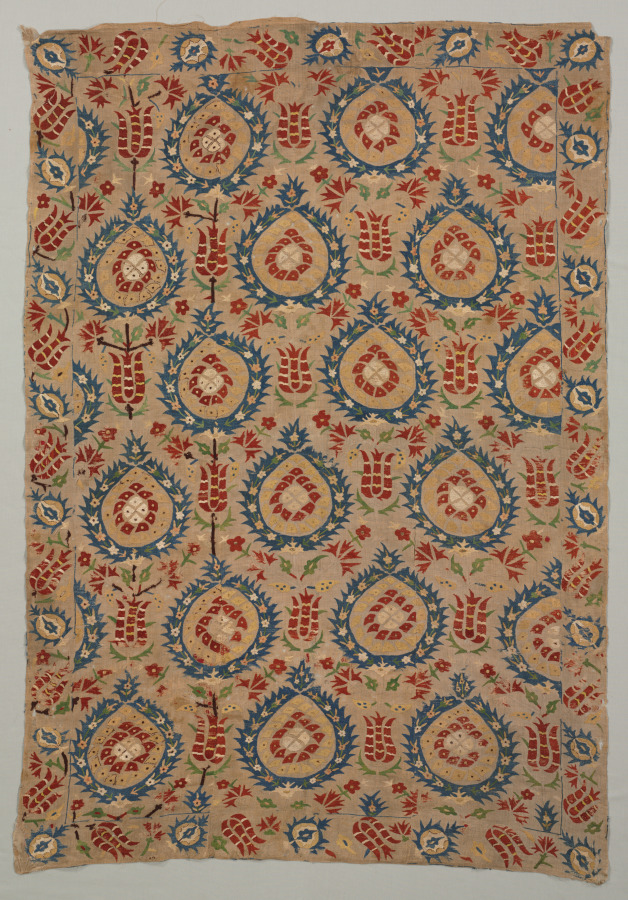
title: Embroidered quilt with pomegranates and tulips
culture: Turkey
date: 1600s-1700s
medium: plain weave: linen; embroidery, running stitch: silk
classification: Embroidery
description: In Turkey, embroidered motifs were often adapted from Ottoman court art, especially luxury silks. Even the same six colors of silk thread were used: crimson or red, blue, green, and brown/black, plus yellow and white that replaced costly gilt- and silver-metal thread. In a typically bold style, pomegranates are framed by serrated leaves. Most of the original dark brown silk thread of the floral stems has disintegrated, revealing black ink outlines on the linen ground.